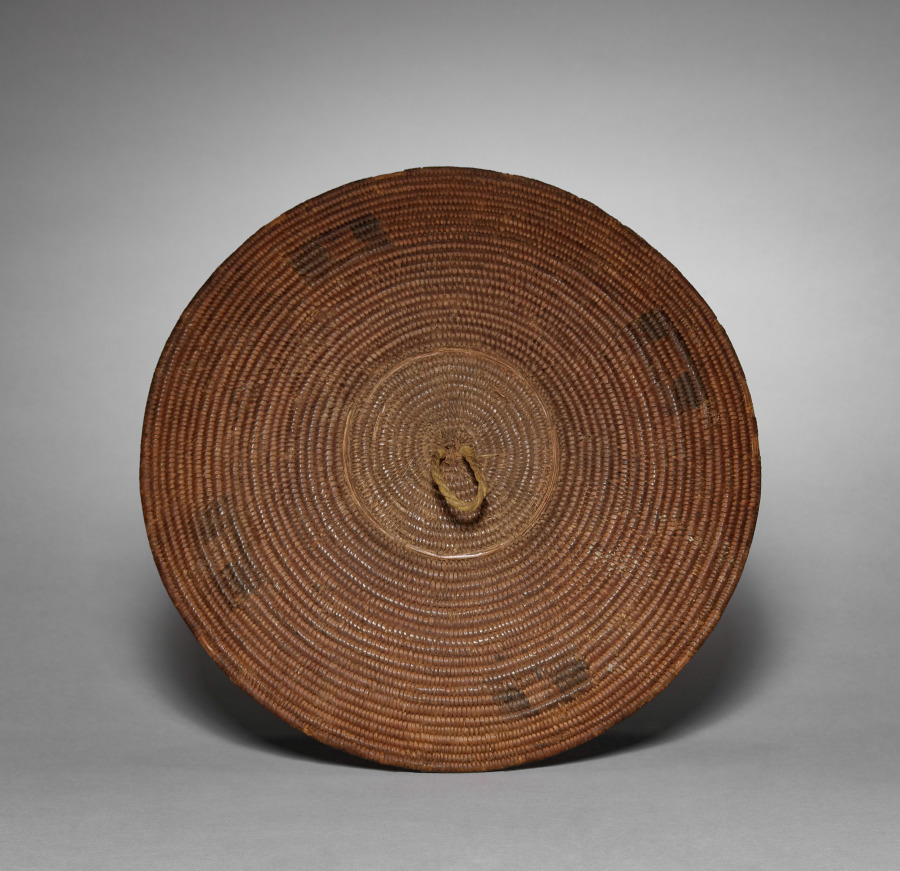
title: Pot Lid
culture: Africa, Southern Africa, South Africa, Zulu-style maker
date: 1900s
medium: Plant fiber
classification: Implements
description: This large, beautifully shaped vessel was used for the serving of beer, an essential component of Zulu hospitality. Undecorated vessels were for private household use, and ornamented examples were reserved for guests. Zulu pottery is produced by women, and is typically thin-walled, with a burnished black surface. Decoration may be incised around the shoulder, as in this example, or may consist of raised bumps that resemble body scarification. The basketry lid protects the vessel's contents from flies or debris; contemporary pot lids are often woven of telephone wire with a colorful plastic coating